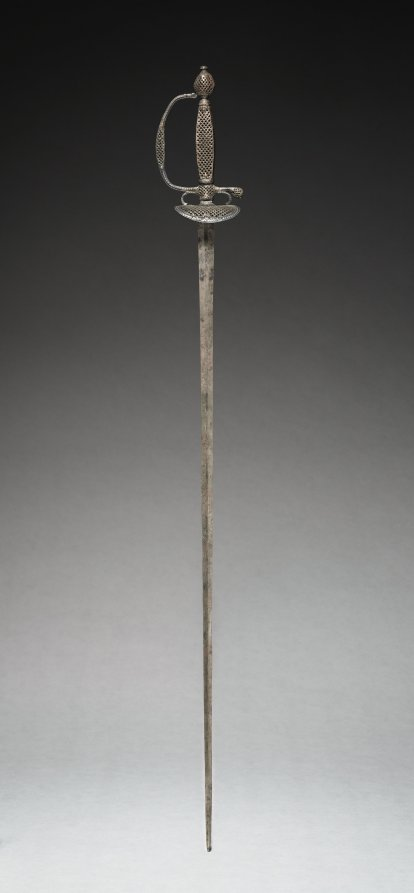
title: Child's Sword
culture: France, Paris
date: c 1780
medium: stainless steel, silver and brass wire inlay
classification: Arms and Armor